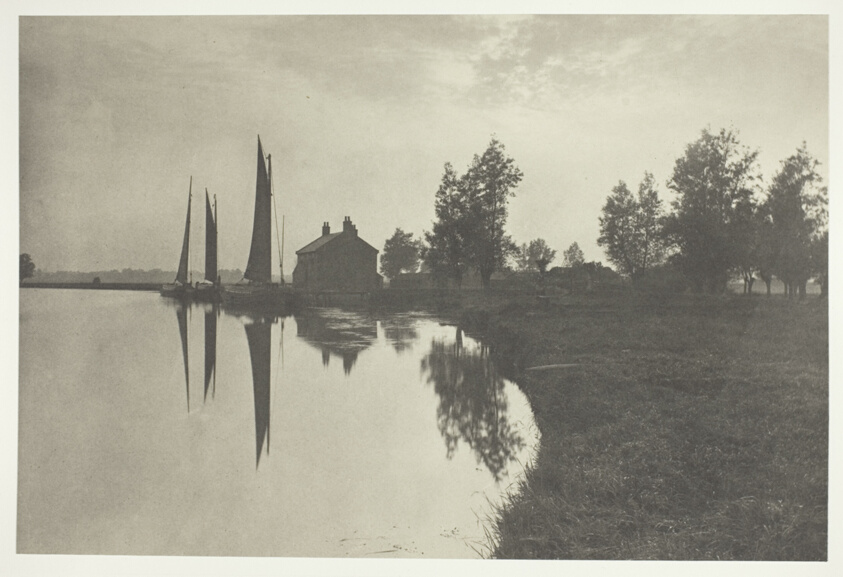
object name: Photograph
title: Cantley: Wherries Waiting for the Turn of the Tide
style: 19th century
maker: Peter Henry Emerson (English, born Cuba, 1856–1936)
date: 1886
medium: Platinum print, pl. XXIV from the album "Life and Landscape on the Norfolk Broads" (1886)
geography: England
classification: platinum print; photographic process; photography; photograph